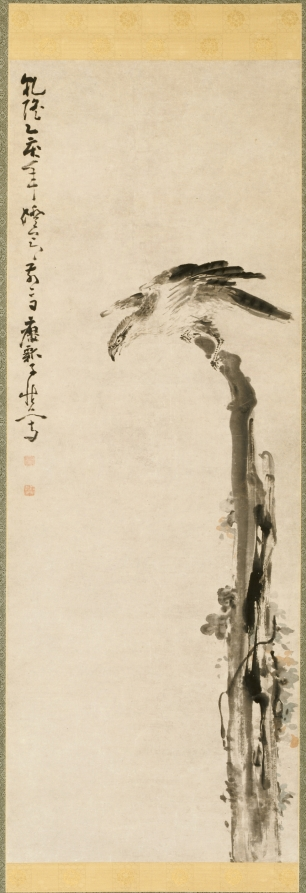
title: Eagle on a Tree Trunk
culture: China, Qing dynasty (1644–1911), Qianlong reign (1736–95)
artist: Huang Shen (Chinese, 1687–after 1768)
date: 1755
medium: Hanging scroll; ink and color on paper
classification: Painting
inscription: 乾隆乙亥年燈節前二日癭瓢子慎写。 [印]黃慎; 恭壽。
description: Huang Shen’s swift painting style is paralleled in his calligraphy. The vertical line in running script echoes the fluid form of the eagle on a tree trunk covered with a twisted vine. A native of Fujian province, Huang came to Yangzhou in 1724 to make his living as a painter. He needed years to develop a style that met the taste of his clients. He eventually became known as a figure painter and as one of the Eccentrics from Yangzhou, a group of local artists known for their unorthodox painting style.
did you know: With its wings partially lifted and sharp beak open in expectation, the eagle seems intent on some unseen prey below.